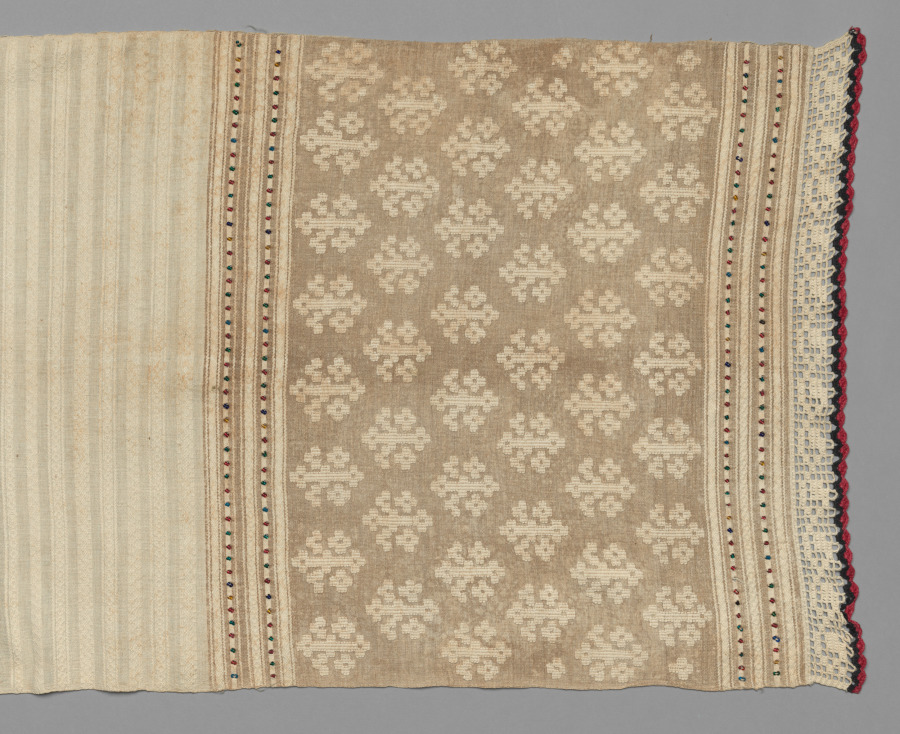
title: Towel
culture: Spain(?)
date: 1900–1920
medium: Plain weave and weft brocaded linen: crochet and embroidery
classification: Textile